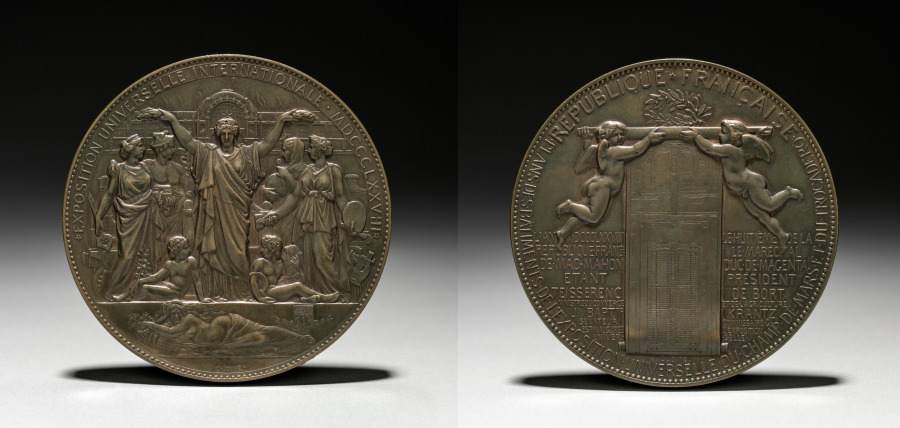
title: Medal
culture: France, 19th century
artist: Eugène André Oudiné (French, 1810–1887)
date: 1878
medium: bronze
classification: Metalwork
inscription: "EXPOSITION UNIVERSELLE INTERNATIONAL . MDCCCLXXVIII"; below: "OUDINÉ."